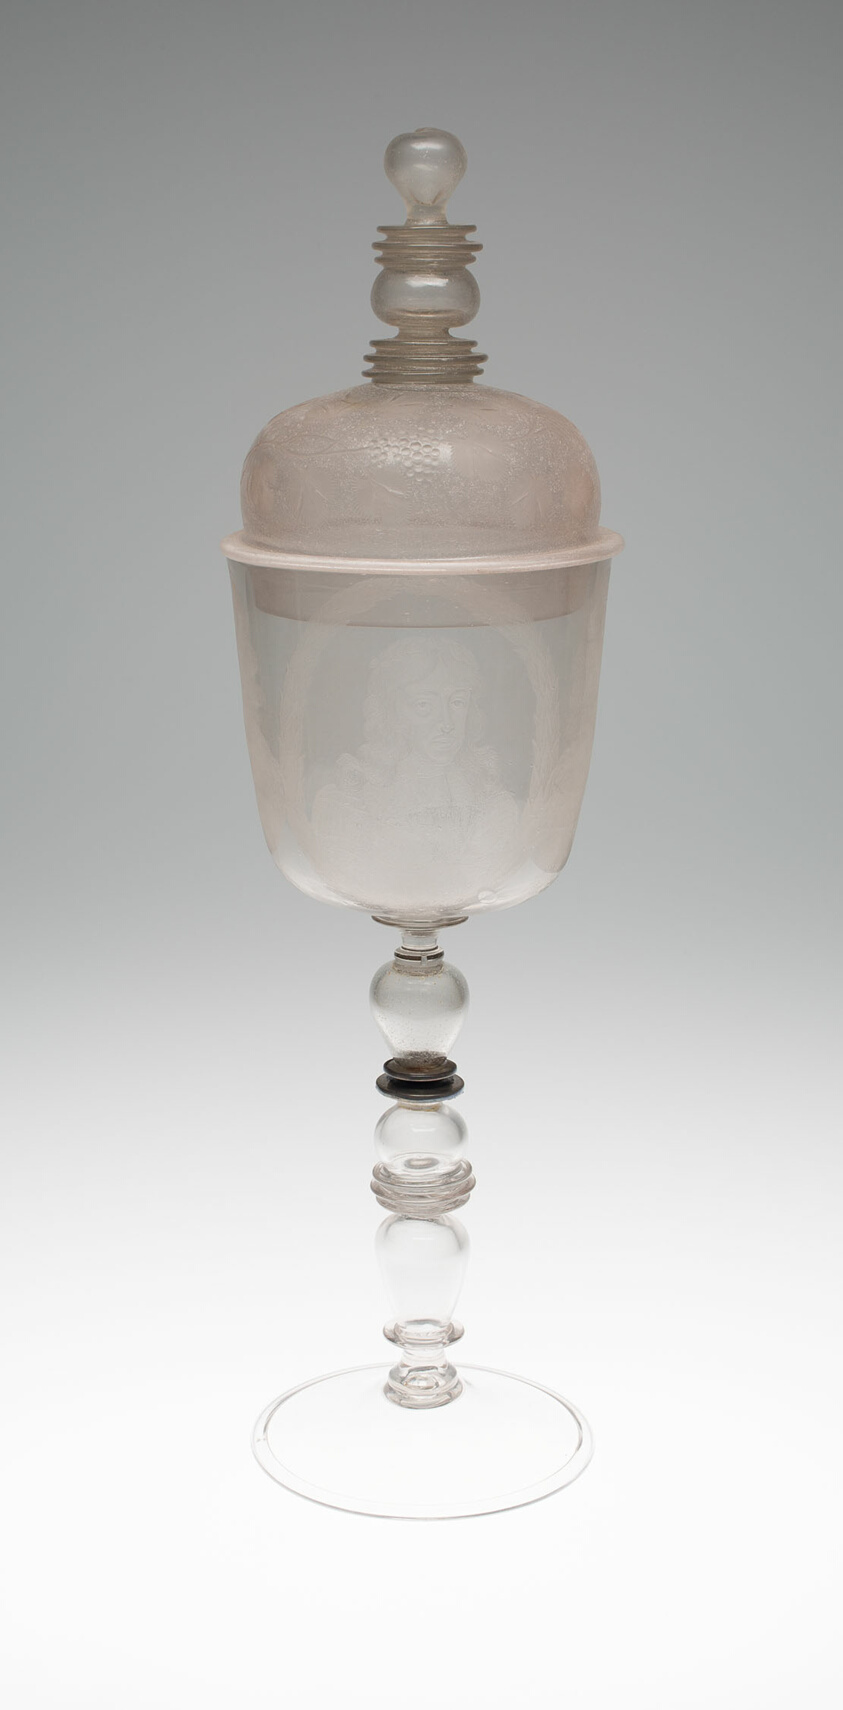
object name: Glass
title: Goblet (Pokal)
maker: Georg Schwanhardt; German, active mid-17th century; Nuremberg, Germany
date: c. 1660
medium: Glass and silver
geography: Nuremberg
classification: drinking vessel; glass; european decorative arts